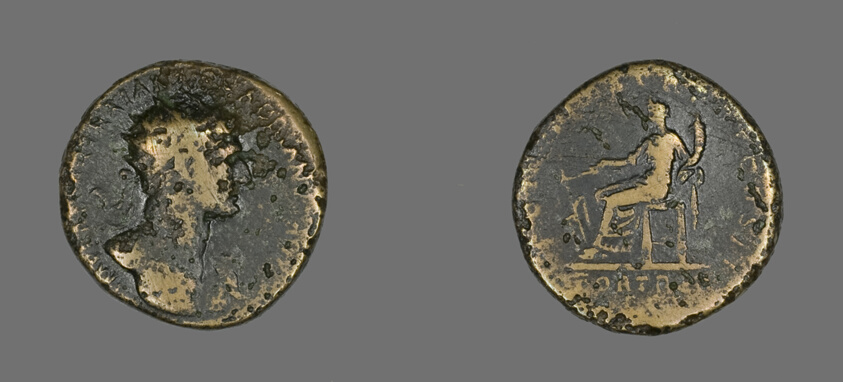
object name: Coin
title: Dupondius (Coin) Portraying Emperor Hadrian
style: roman (ancient, style or period), ancient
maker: Roman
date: 117-138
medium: Bronze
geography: Roman Empire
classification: coin; ancient art